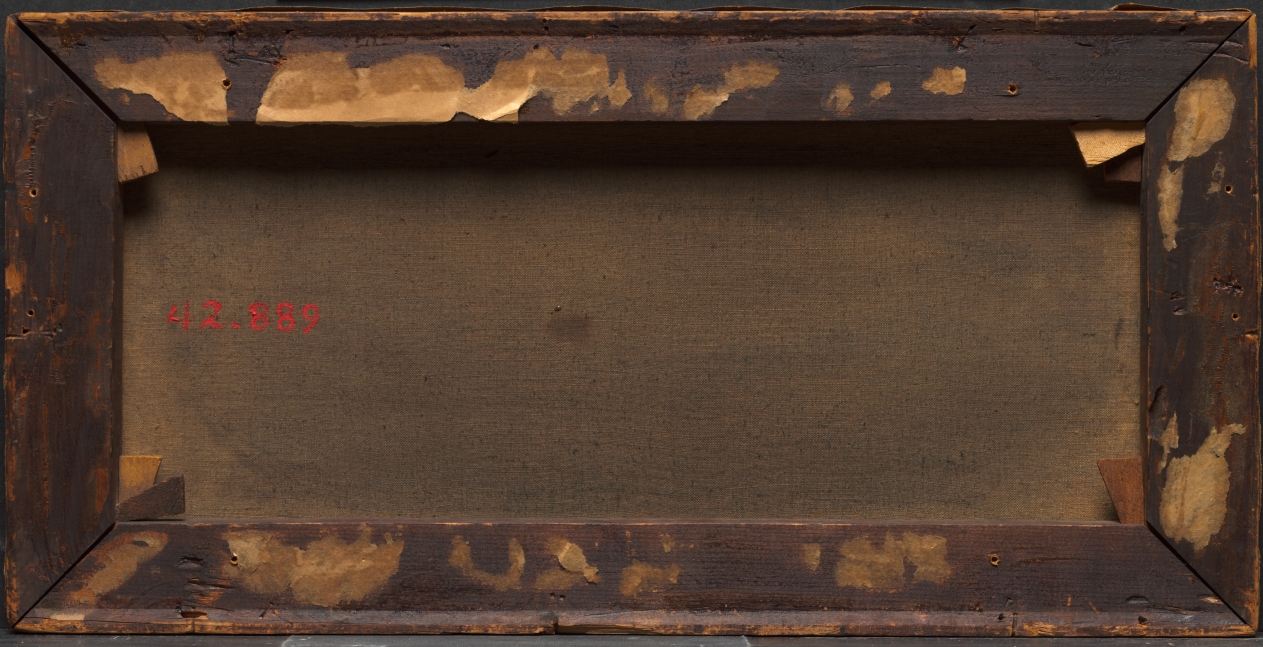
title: Fleecy Clouds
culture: America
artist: imitator of George Inness (American, 1825–1894)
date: 1881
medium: oil on canvas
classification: Painting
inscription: Signed lower right: "G. Inness / 81"